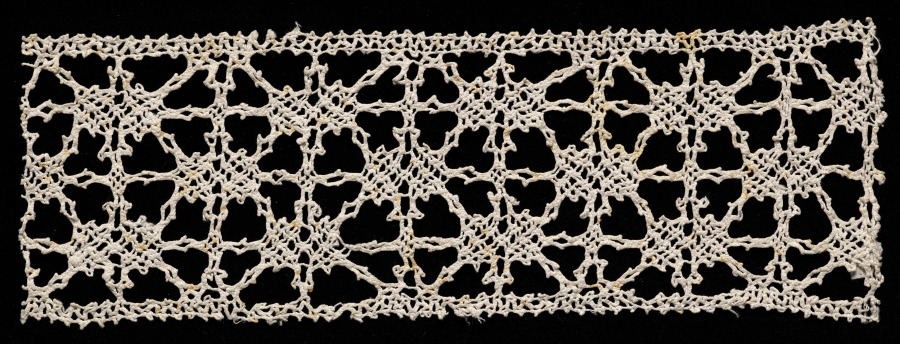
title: Lace Insertion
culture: Italy, Venice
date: 1540–60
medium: Bobbin lace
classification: Lace